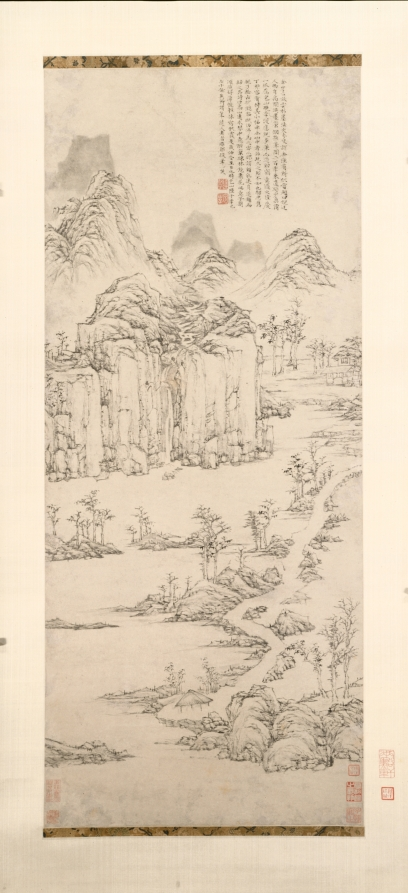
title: Daoist Retreat in Mountain and Stream (Landscape after Ni Zan [1301–1374])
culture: China, Ming dynasty (1368–1644)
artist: Lu Zhi (Chinese, 1496–1576)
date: 1567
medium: hanging scroll; ink on paper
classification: Painting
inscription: Artist's inscription, signature, and 3 seals: In my youthful days I liked to imitate the ink method of Yün-lin [Ni Tsan]. Mr. Wen, the academician [Wen Cheng-ming], remarked that I barely succeeded in achieving some resemblance. He once honored me with the inscription "lofty and imperturbable indeed was the personality of Ni Yü [Ni, the Odd]. Pale ink and blue smoke were formed by his scribbling brush. His surviving works have become so rare in the last two hundred years; only Pao-shan [Lu Chih] carries on his true tradition." In my older years, having to comply with frequent requests for paintings, my brushwork has become stronger than before and I thought to myself that I may have surpassed the Old Master. In the ting-mou year of the Lung-ch'ing era [1567] a friend brought a small painting [by Ni Tsan] and showed it to me in the mountains. I studied and enjoyed it for a long time, then realized that I was actually inferior. This gave me second thoughts about my earlier style, so I selected a piece of old window paper and did this painting in imitation. My friend was kind enough to say that it was truly a quick and close resemblance. I then wrote a colophon and presented the painting to him. My poem says: High mountains and distant waters are the thoughts coming from the lute; The drunken leaves and the sparse woods are merely flowers in the mirror. This idea, I'm sure, will be understood by Tzu-ch'i, one who appreciates my art, It is for him that I have painted on thin paper with light touches, The cloudy color of an autumn evening. This is the winter solstice of the same year. By then, Pao-shan, Mr. Lu, was already over seventy years of age. Could it be that one's brush also gets old together with one's age, as the saying goes. I put down my brush with a laugh. [2 seals] Lu Shu-p'ing shih, Pao-shan tzu. [seal, bottom left corner] Lu Chih shu-p'ing. trans. WKH 6 additional seals of Chu Ching-hou (n.d.).